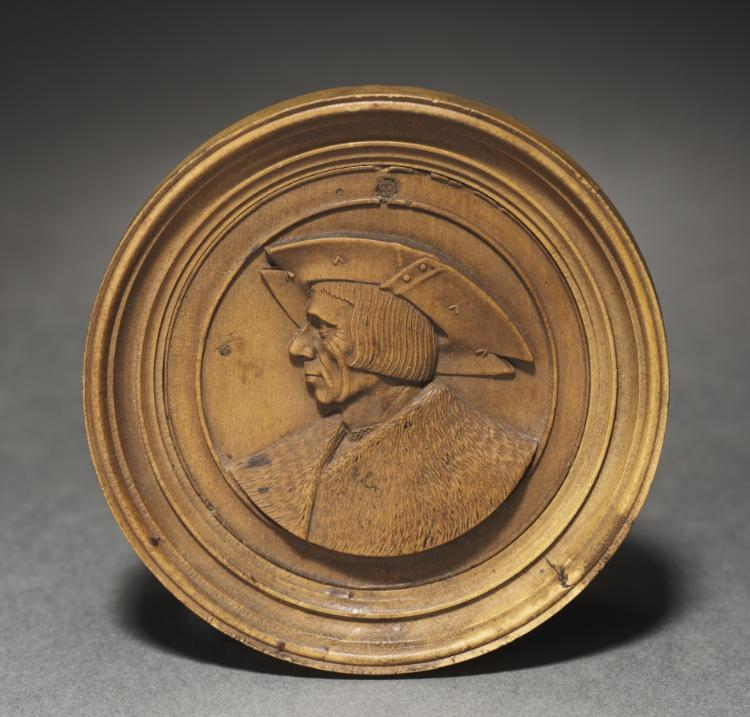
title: Portrait of a Man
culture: Germany, early 16th century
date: early 1500s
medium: boxwood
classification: Sculpture